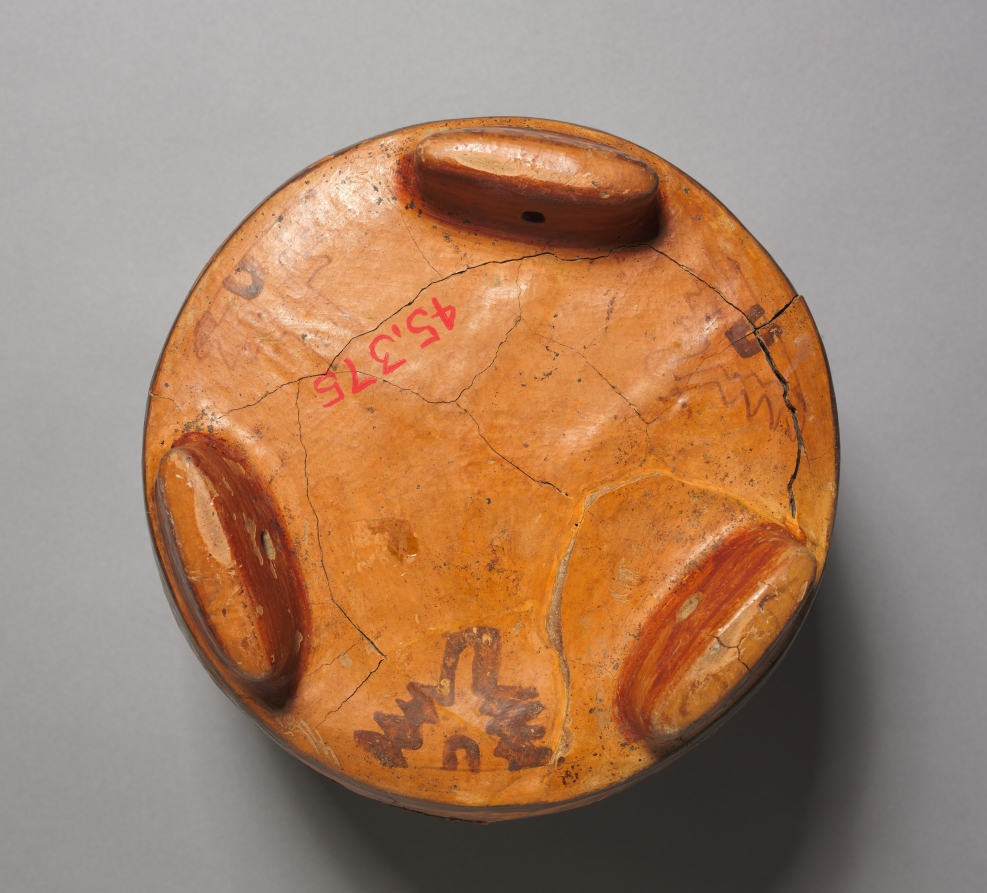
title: Vase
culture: Honduras, Maya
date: 250–900 CE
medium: earthenware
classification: Ceramic